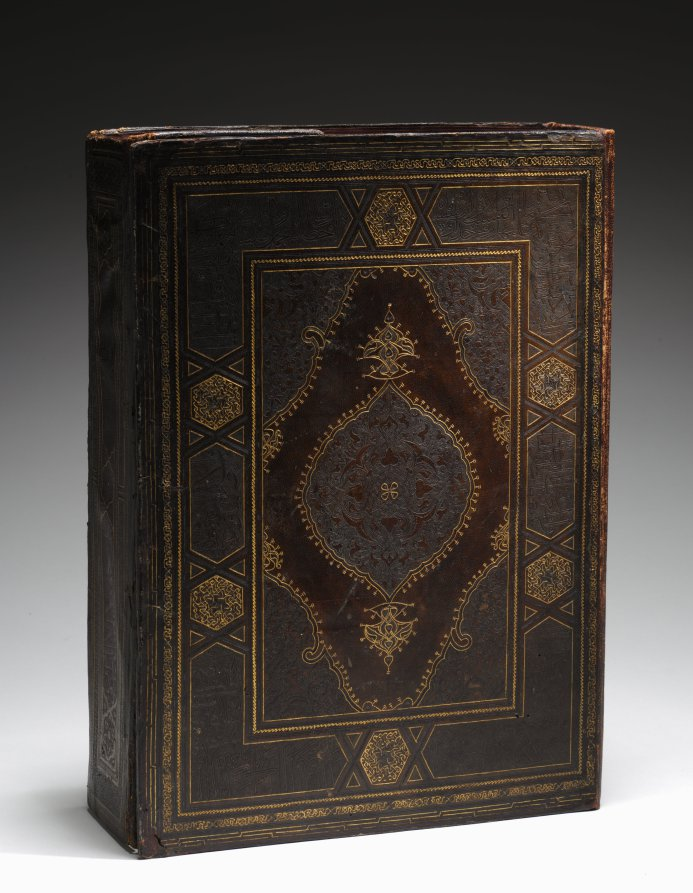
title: Bookbinding for a Qur'an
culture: Turkey, Istanbul, Ottoman period, 15th century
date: 1460–1500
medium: leather over paper pasteboards; outer cover tooled, blue paint; inner covers openwork designs over colored papers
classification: Book Binding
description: Islamic book covers generally have a triangular flap attached to the rear cover of the binding which is tucked under the front cover to protect the outside edge of the pages. The outer covers of this particularly elaborate example feature panels with Qur'anic inscriptions, interlace patterns, and a central medallion filled with floral and arabesque designs. The inner covers offer a superb example of leather openwork, a leather technique that originated in northeastern Iran in the 1400s.